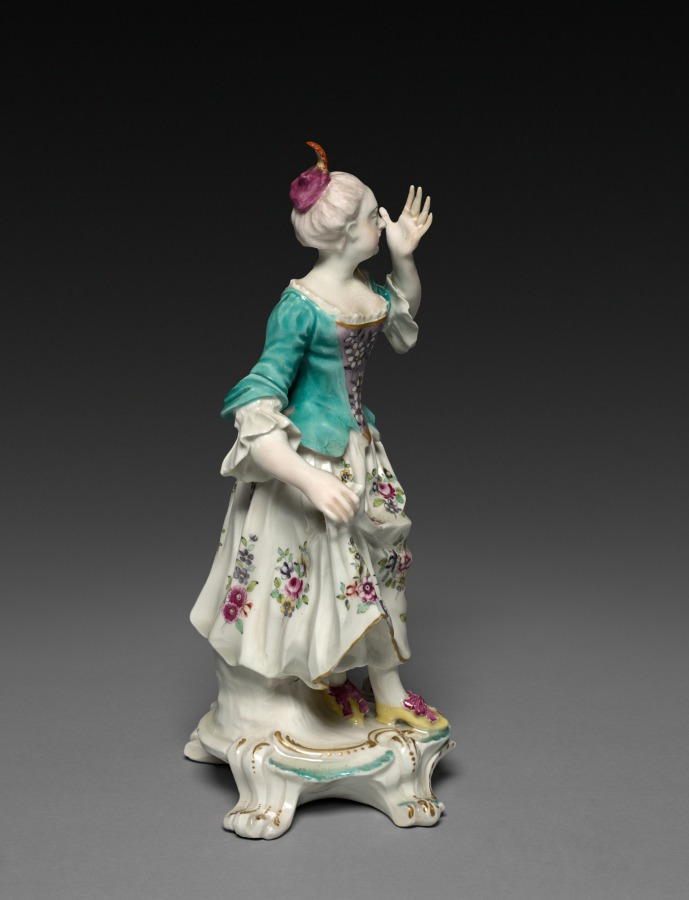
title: Dancer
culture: England, Derby, 18th century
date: c. 1760–1765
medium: soft-paste porcelain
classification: Ceramic